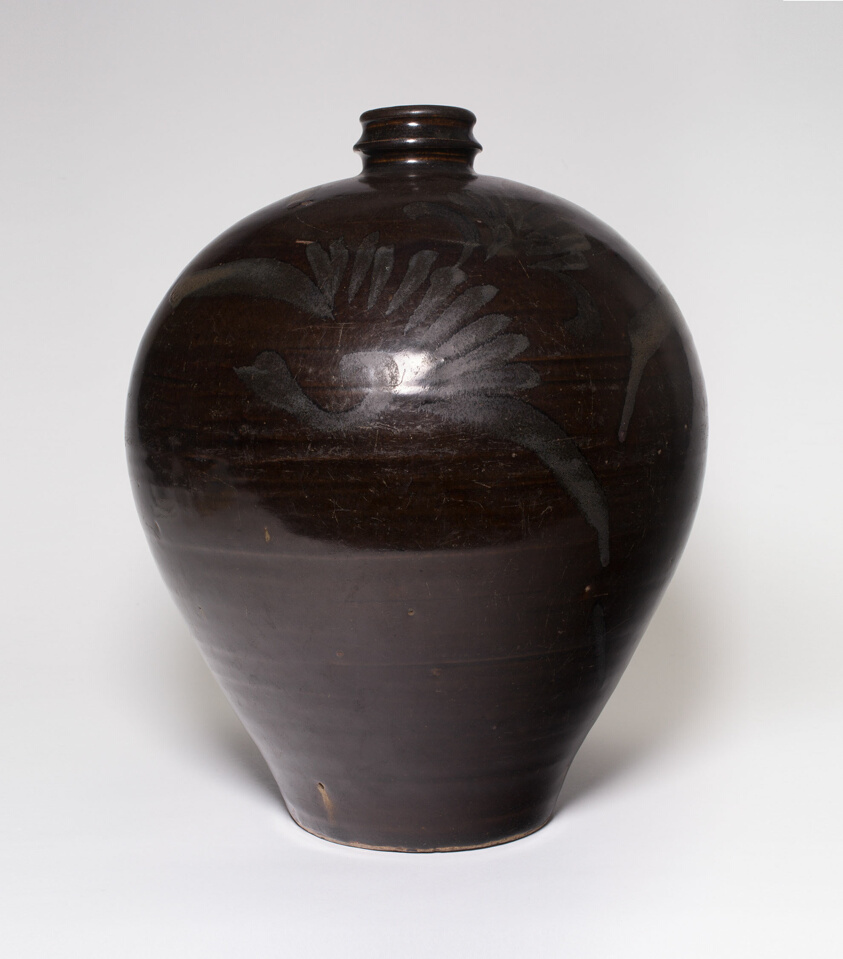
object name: Vessel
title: Ovoid Vase with Floral Sprays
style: Chinese (culture or style)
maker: China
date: Song dynasty (960–1279)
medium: Jian ware; stoneware with brownish black glaze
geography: China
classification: vase; vessel; stoneware; asian art; ceramics